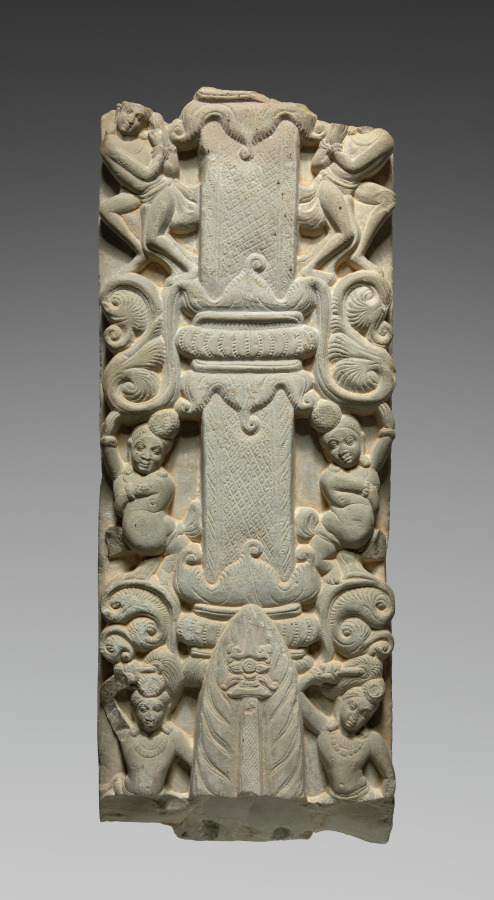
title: Veneration of the Buddha as a Fiery Pillar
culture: Southern India, Andhra Pradesh, Nagarjunakonda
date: 200s CE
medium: limestone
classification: Sculpture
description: At the bottom of this carved panel is the depiction of a pillar incised with cross-hatching and surrounded by a halo of flames. A stylized lotus and a pointed trident symbol marking good fortune and divinity crown the pillar. This image indicates the presence of the Buddha and underscores his superhuman qualities, including radiance and power to work magic. Two male figures hold fly whisks of honor on either side. Above is a golden pillar covered with jewels that the Buddha miraculously generated. Swirling leaves sprout from grooved disks at regular intervals, and celestial beings fly and dance in praise.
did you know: The acanthus leaves sprouting from the pillar echo Greco-Roman motifs.